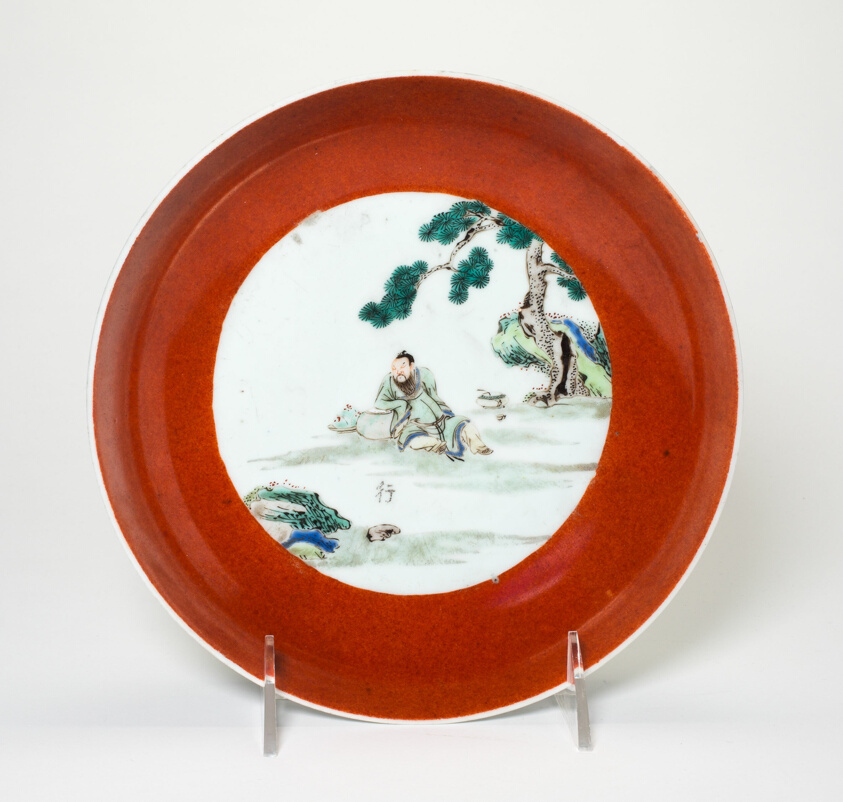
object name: Textile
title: Dish with Scholar in Garden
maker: China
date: Qing dynasty (1644–1911), Yongzheng period (1723–1735)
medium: Porcelain painted in overglaze enamel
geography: China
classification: porcelain; asian art; ceramics